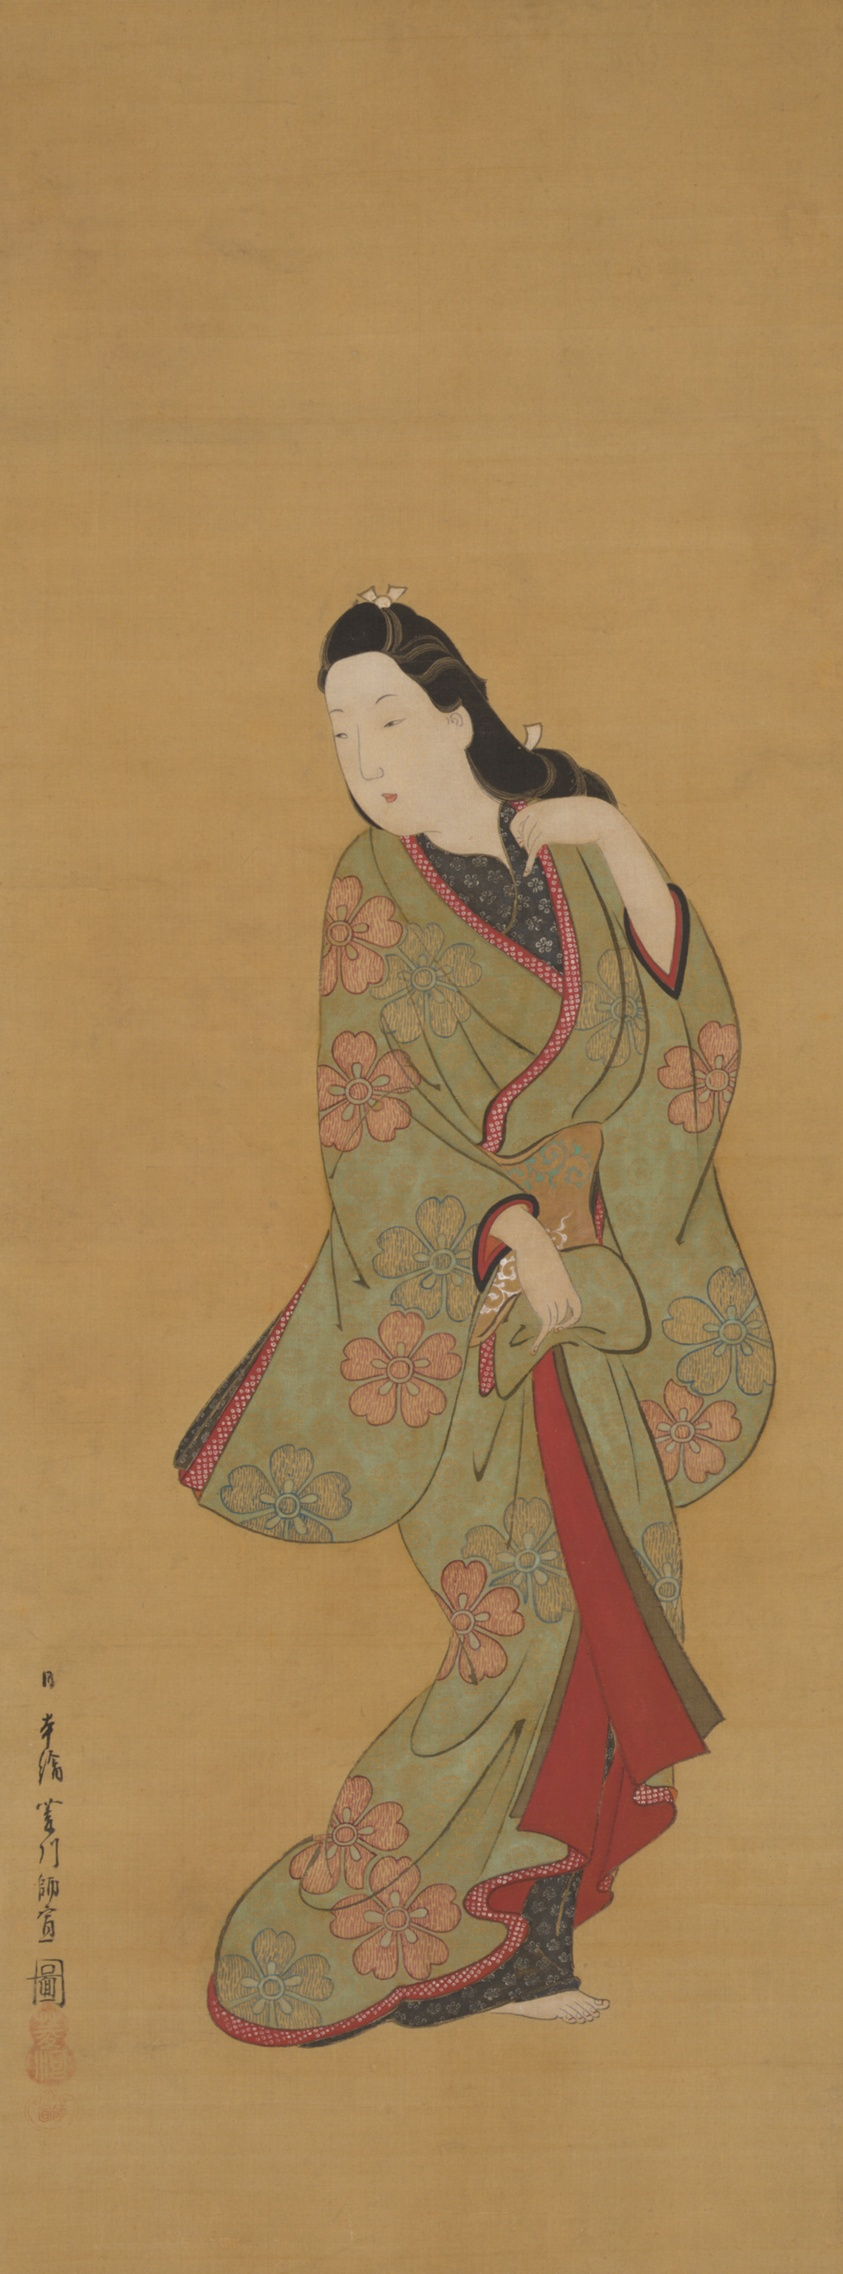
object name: Painting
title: Beauty Turning Her Head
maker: Hishikawa Moronobu (Japanese, died 1694)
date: c. 1685-94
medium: Hanging scroll; ink and colors on paper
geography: Japan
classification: asian art; scroll; hanging scroll